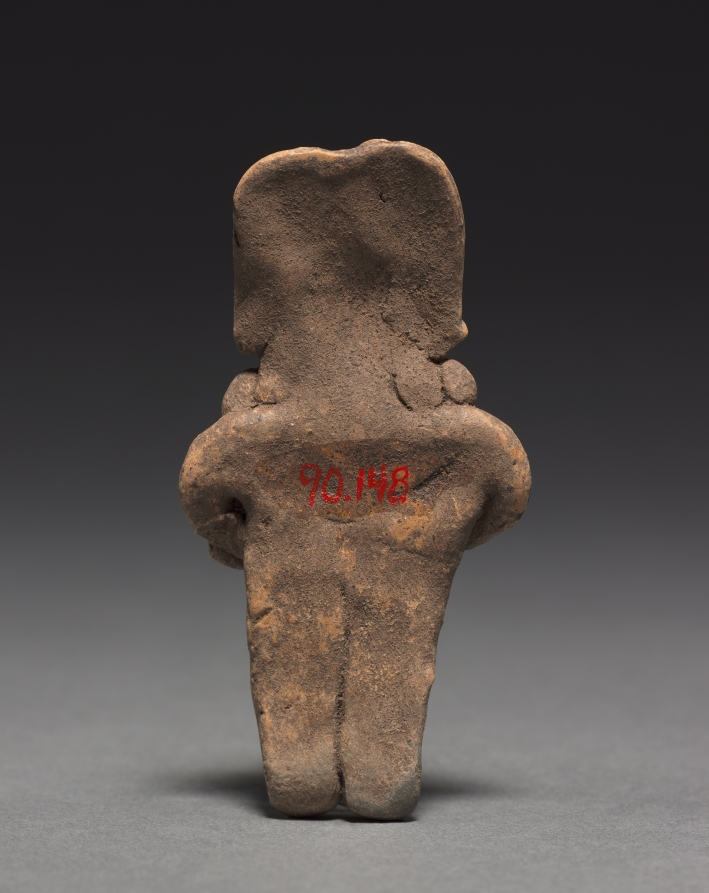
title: Male Figurine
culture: Mesoamerica, Mexico, Guanajuato, Chupícuaro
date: 400–100 BCE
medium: pottery with traces of white and red pigment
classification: Sculpture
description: The Chupícuaro culture, located north of Mexico City in the state of Guanajuato, created a distinctive ceramic tradition including small clay figurines. This example is said to belong to a group of ten figurines from the same burial or cache (1990.145–154). The group includes both males and females that can be sorted into couples based on size.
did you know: Groups of figurines were sometimes arranged in scenes and likely used in household rituals.